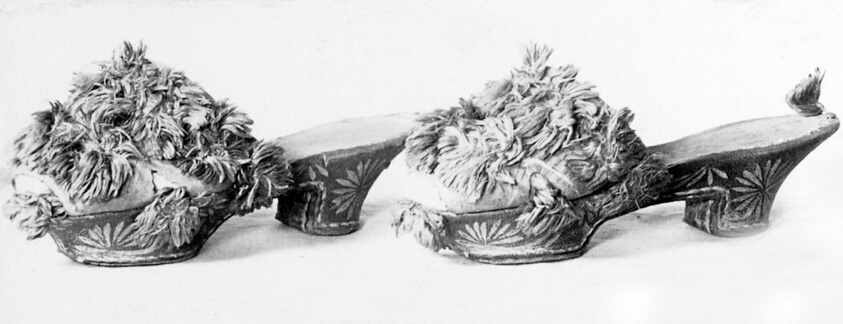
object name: Costume and Accessories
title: Woman's Clogs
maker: Spain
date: 18th century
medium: Leather, wood and silk, fringed tops (platform soles)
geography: Spain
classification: textile; shoes - misc; costume accessory - shoe; costume; dress (garment); clothing